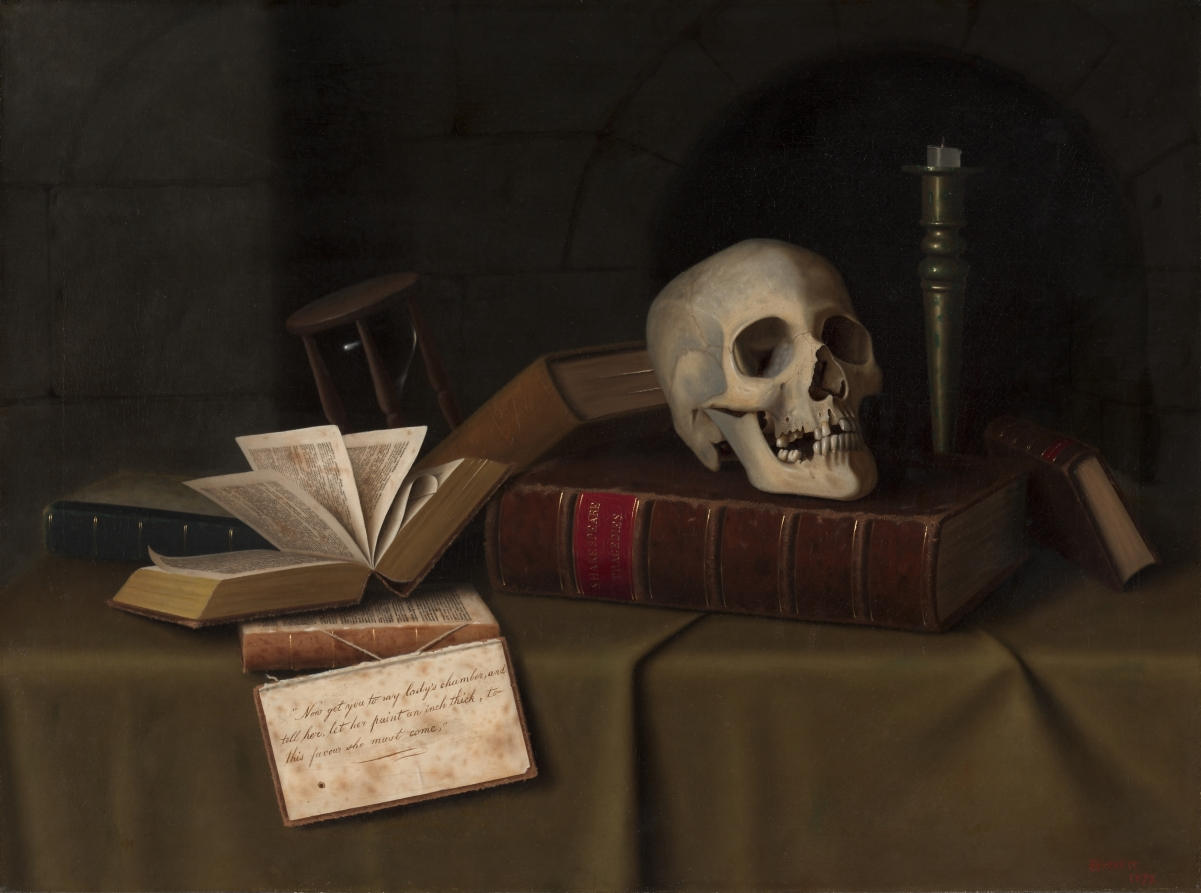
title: Memento Mori, "To This Favour"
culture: America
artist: William Michael Harnett (American, 1848–1892)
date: 1879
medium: oil on canvas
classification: Painting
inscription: signed lower right: WMHARNETT / 1879 [WMH in monogram].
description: The Latin term memento mori describes a traditional subject in art that addresses mortality. In Harnett’s example, the extinguished candle, spent hourglass, and skull symbolize death. A quote from William Shakespeare’s Hamlet, inscribed on the inside cover of a tattered book, reinforces the theme. It comes from the play’s famed graveyard scene where Hamlet discovers a skull and grimly ponders his beloved Ophelia, ironically unaware that she is already dead. The "paint" in the quote not only refers to Ophelia’s makeup, but also wittily evokes the artifice of Harnett’s picture.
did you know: Harnett’s family left Ireland during the potato famine and emigrated to the United States.